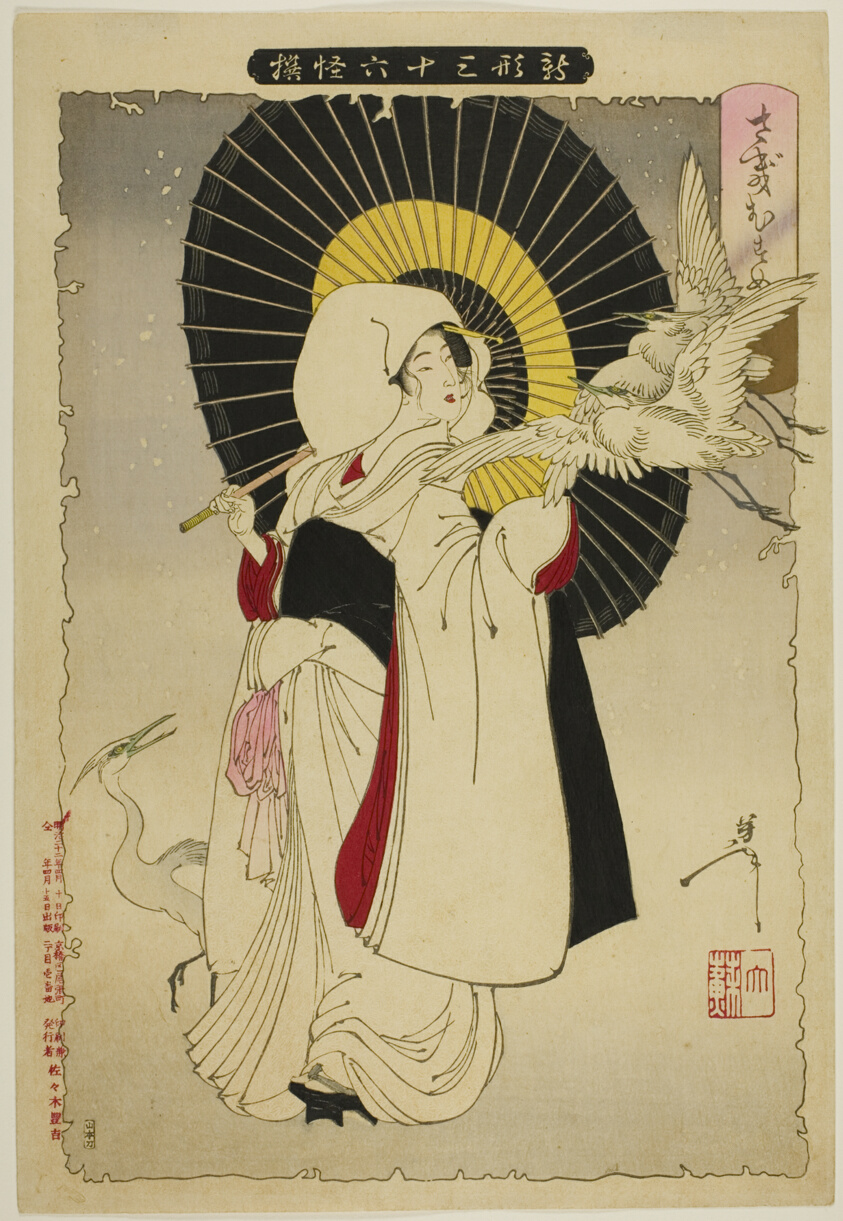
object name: Print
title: Heron Maiden from the series "New Forms of Thirty-Six Ghosts"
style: Japanese (culture or style)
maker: Tsukioka Yoshitoshi (Japanese, 1839–1892)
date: 1889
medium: Color woodblock print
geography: Japan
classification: woodblock print; print